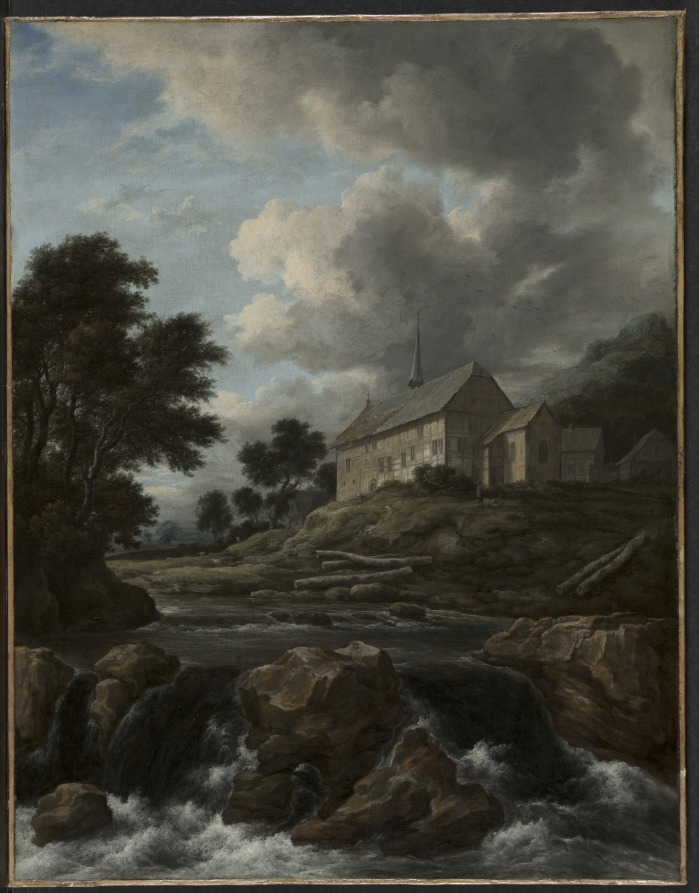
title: Landscape with a Church by a Torrent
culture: Netherlands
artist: Jacob van Ruisdael (Dutch, 1628/29–1682)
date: c. 1670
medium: oil on canvas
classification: Painting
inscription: Signed lower right: JvRuisdael [JvR in monogram]"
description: It is not known if Ruisdael considered his paintings to be social or moral commentary, for no documents from his lifetime indicate how the artist or his patrons interpreted the works. But in this painting dangerous rapids block access to the chapel, and severed logs litter the middleground, hinting at life’s transience and the challenge to reach salvation.